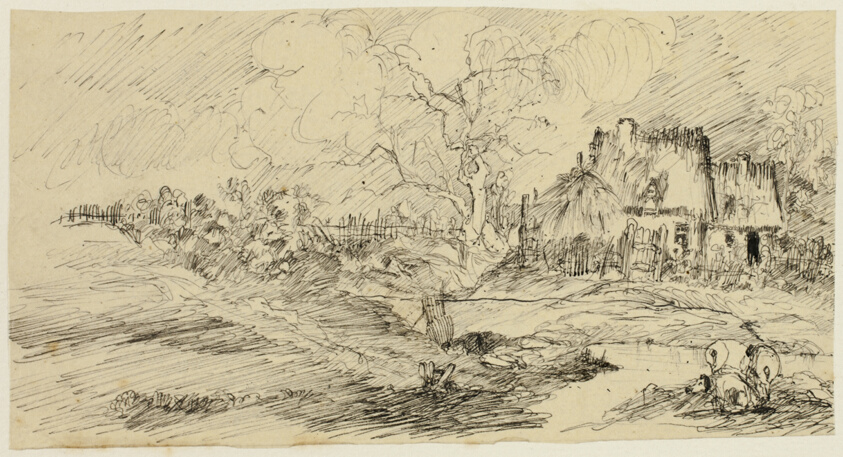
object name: Drawing and Watercolor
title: Country Landscape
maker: Rodolphe Bresdin (French, 1825-1885)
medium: Pen and black ink, on cream tracing paper, laid down on ivory wove paper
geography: France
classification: pen and ink drawings; drawings (visual works); prints and drawing